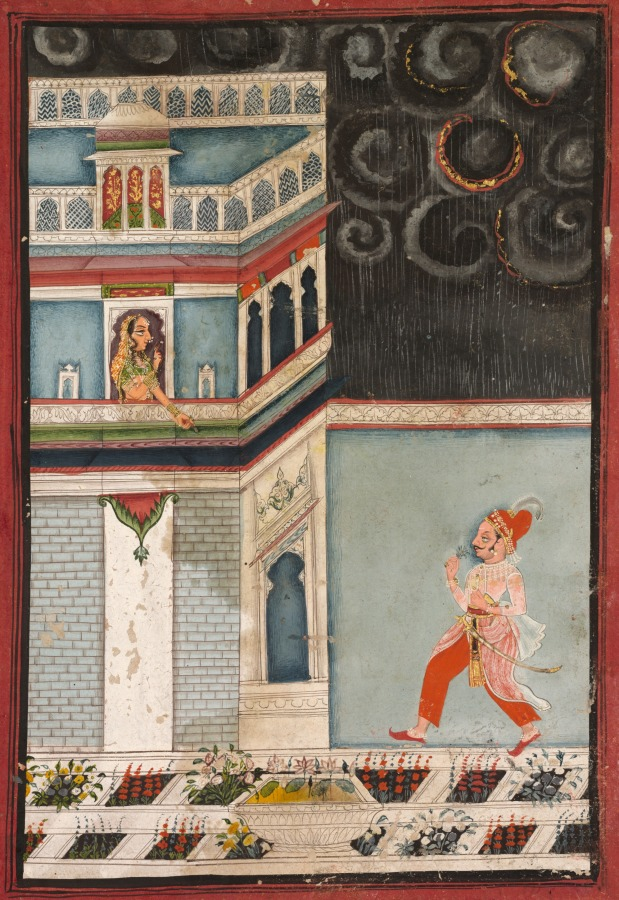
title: Lover's Tryst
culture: India, Rajasthan, Bundi Style, later half 18th century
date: 1750–1800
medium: Gum tempera and gold on paper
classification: Painting